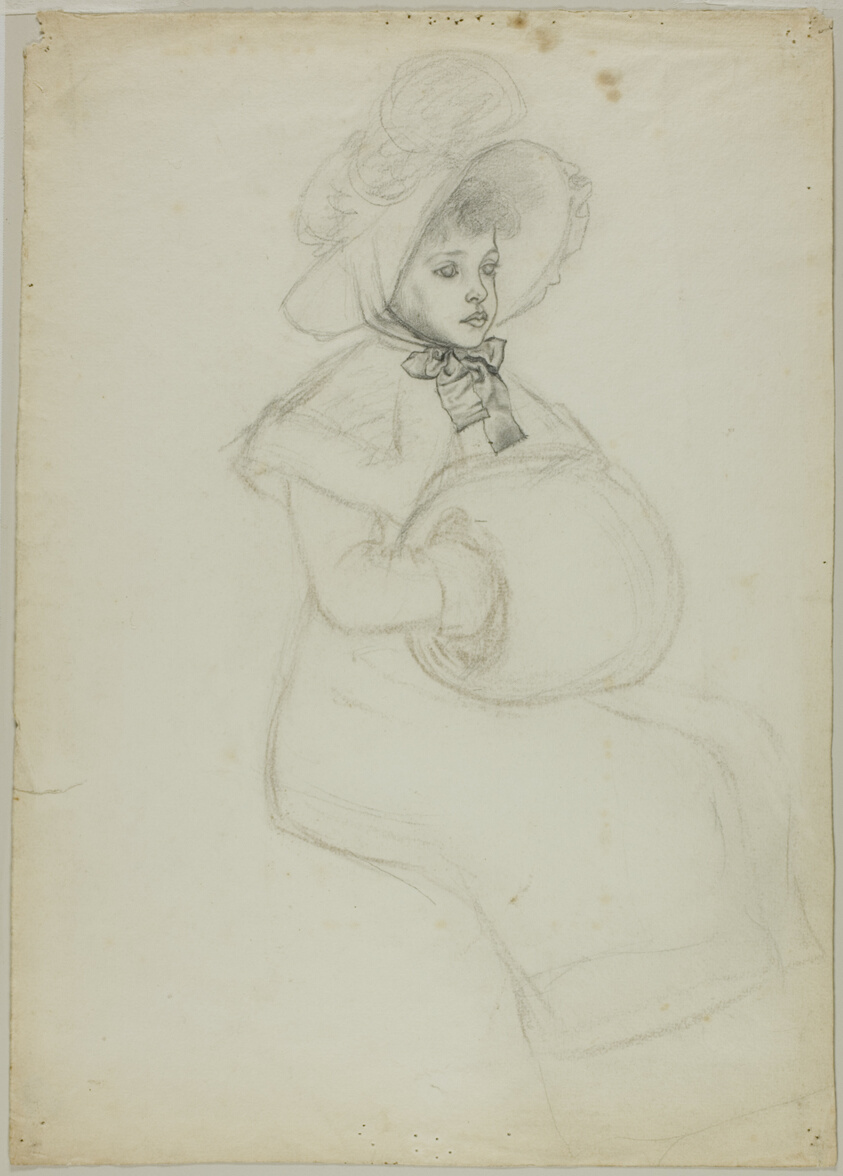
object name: Drawing and Watercolor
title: Seated Girl with Muff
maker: Kate Greenaway (English, 1846-1901)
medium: Graphite, with stumping, and brush and brown chalk wash, on ivory wove paper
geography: England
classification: graphite; drawings (visual works); prints and drawing